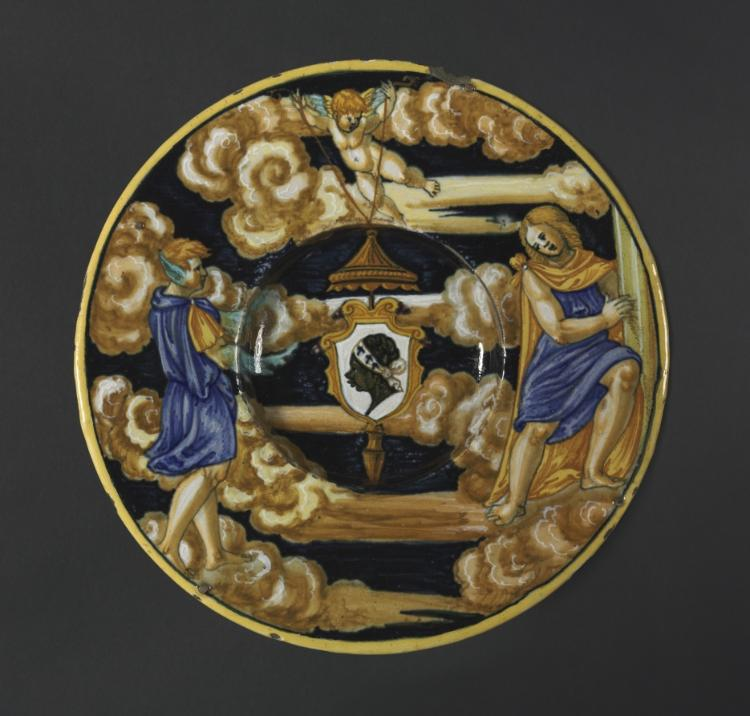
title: Plate with Arms of the Pucci Family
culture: Italy, Urbino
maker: Francesco Xanto Avelli (Italian, 1487?–1544?)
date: 1532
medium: tin-glazed earthenware (maiolica)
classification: Ceramic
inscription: signed: F(rancesco) X(anto) A(velli) (da) R(ovigo)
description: Italian nobles of the 1500s often expressed their wealth, social status, and sophistication by ordering large sets of maiolica that sometimes carried their coats of arms or even likenesses, usually in profile as in portraits of the period. The Pucci family was a powerful noble household in Renaissance Florence who were at times quite close allies of the Medici, a prominent banking family.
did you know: A more contemporary head of the family, Emilio Pucci, became famous as a fashion designer in the 1960s and 1970s.